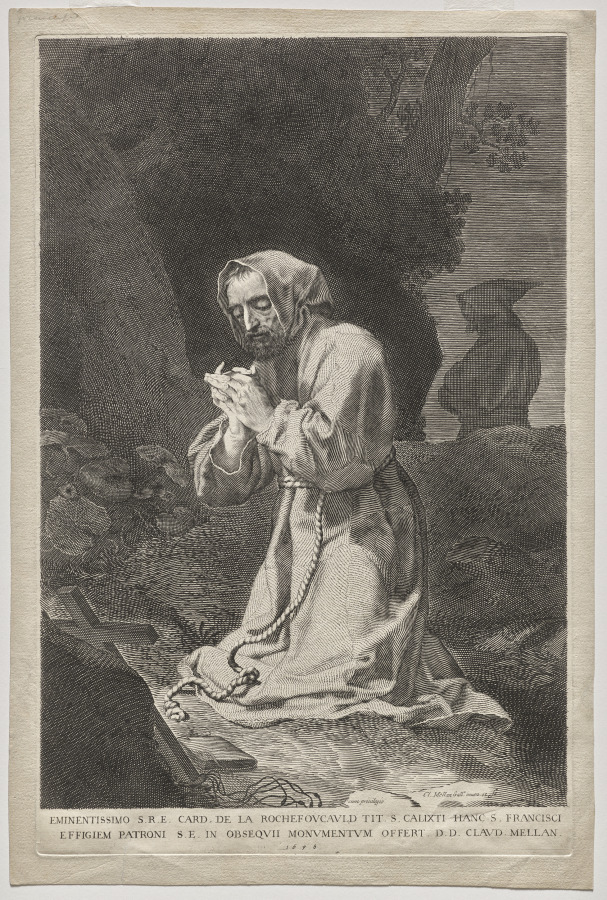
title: St. Francis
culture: France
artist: Claude Mellan (French, 1598–1688)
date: 1638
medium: engraving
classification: Print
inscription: WATERMARK: letters (indisctinct)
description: The French engraver Claude Mellan spent time in Rome, where he developed a unique engraving style that uses simplified linear patterns and swelled lines to create optical, almost abstract effects. He made this image St. Francis, one of several featuring saints in the wilderness, just after he returned to Paris. The engraver’s inventive patterns of lines cross at small angles, creating moiré effects, so that the surface seems to shimmer.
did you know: Notice how the engraver portrayed the cloak of St. Francis with patches of parallel, swelled lines placed at different angles.